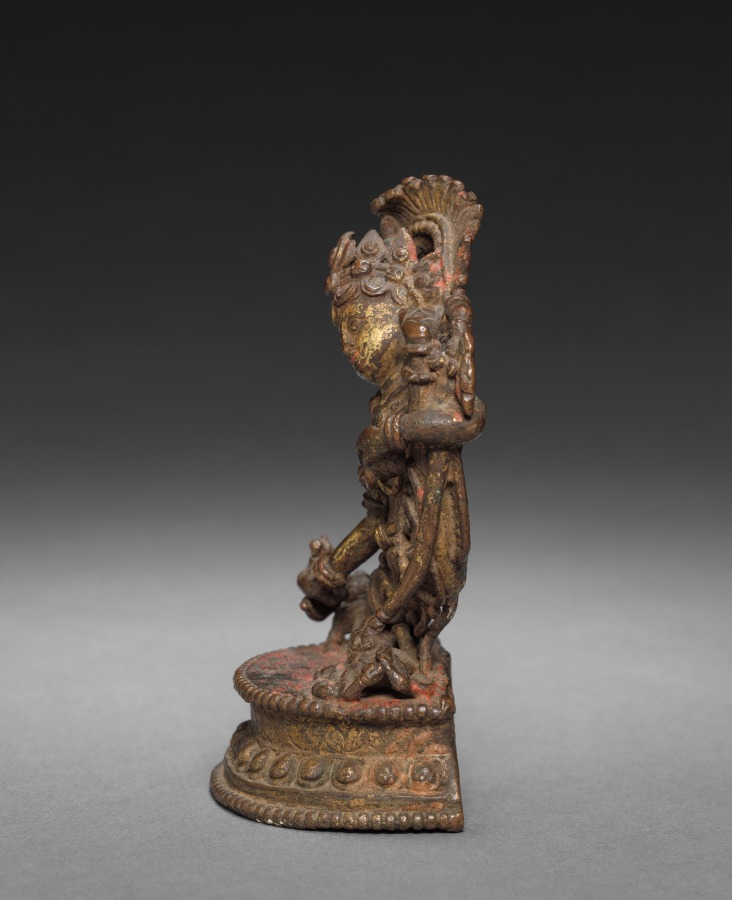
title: Achala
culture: Nepal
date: 1500s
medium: brass or bronze; turquoise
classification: Sculpture